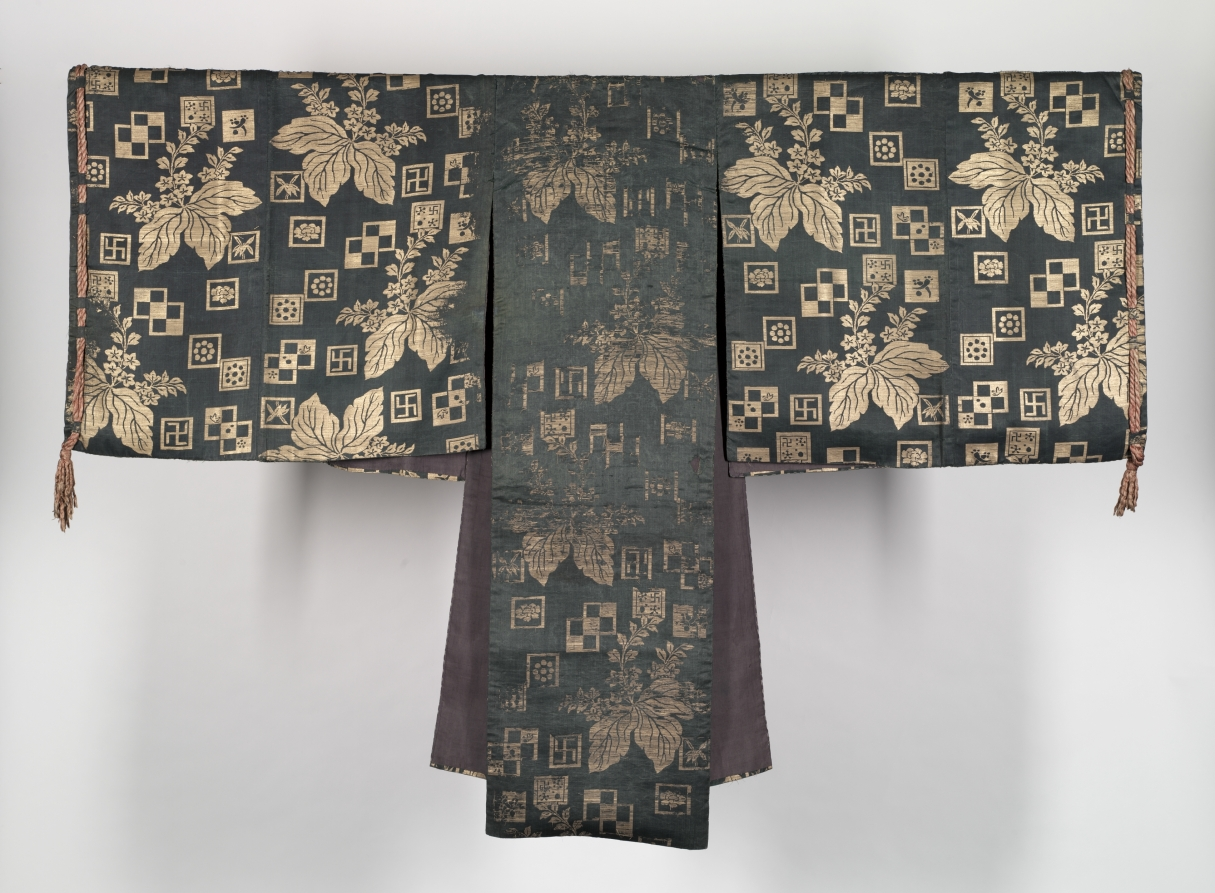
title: Noh Robe (Kariginu)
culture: Japan, Edo period (1615–1868)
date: 1800–1850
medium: silk, satin weave (?) with supplementary metal thread weft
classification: Garment